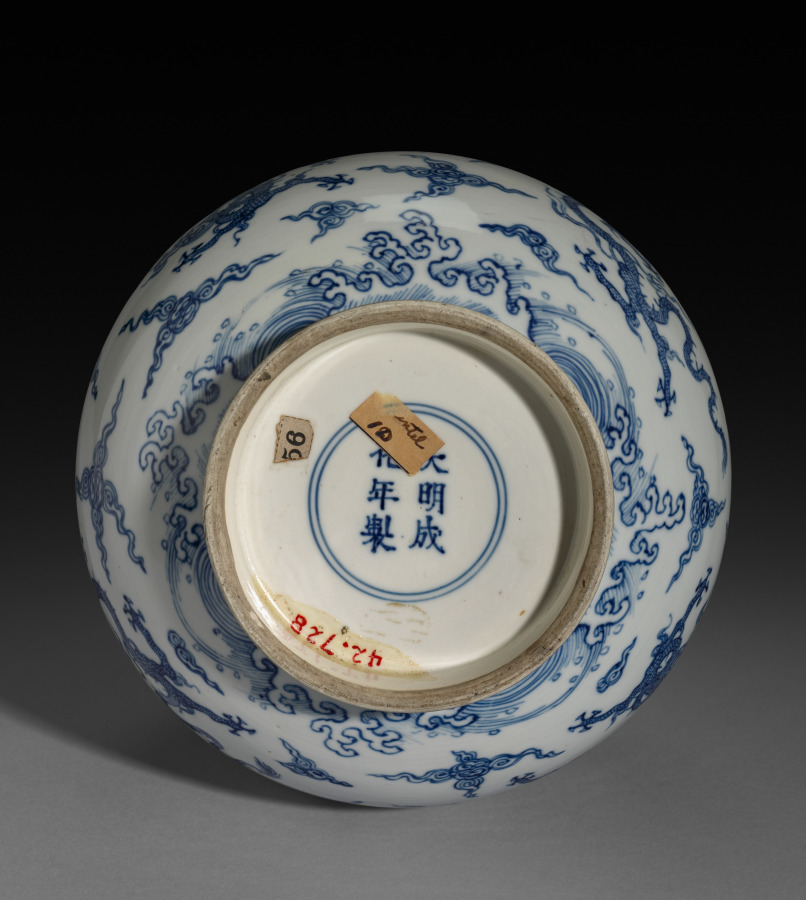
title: Bottle Vase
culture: China, Jiangxi province, Jingdezhen kilns, Qing dynasty (1644-1911), Yongzheng reign (1723-35)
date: 1723–35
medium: porcelain with underglaze blue decoration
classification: Ceramic